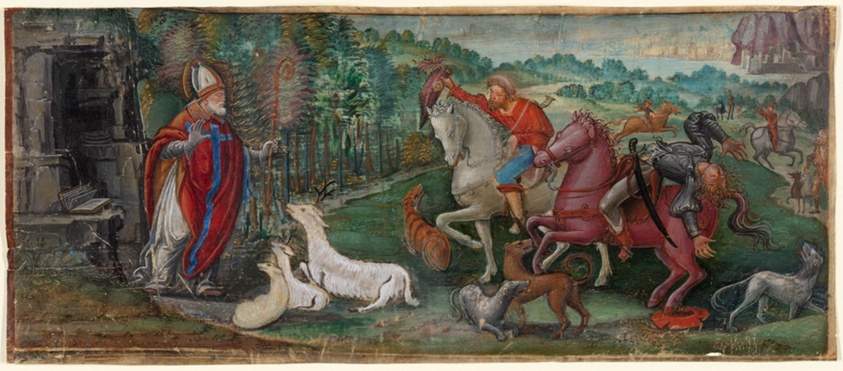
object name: Drawing and Watercolor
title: Miracle of the Deer of Saint Bassiano, from a Choir Book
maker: Master B. F. (possibly Francesco Binasco); Italian (Lombardy), about 1490-about 1545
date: 1500/10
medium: Opaque watercolor and shell gold on parchment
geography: Italy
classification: watercolor; prints and drawing